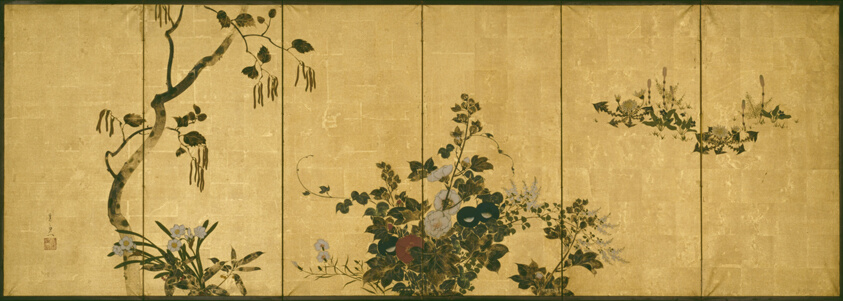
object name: Painting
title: Flowers of Autumn and Winter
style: Japanese (culture or style)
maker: Suzuki Kiitsu (Japanese, 1796-1858)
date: 19th century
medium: Six panel screen; ink, colors and gold leaf on paper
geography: Japan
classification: screen; painting; asian art